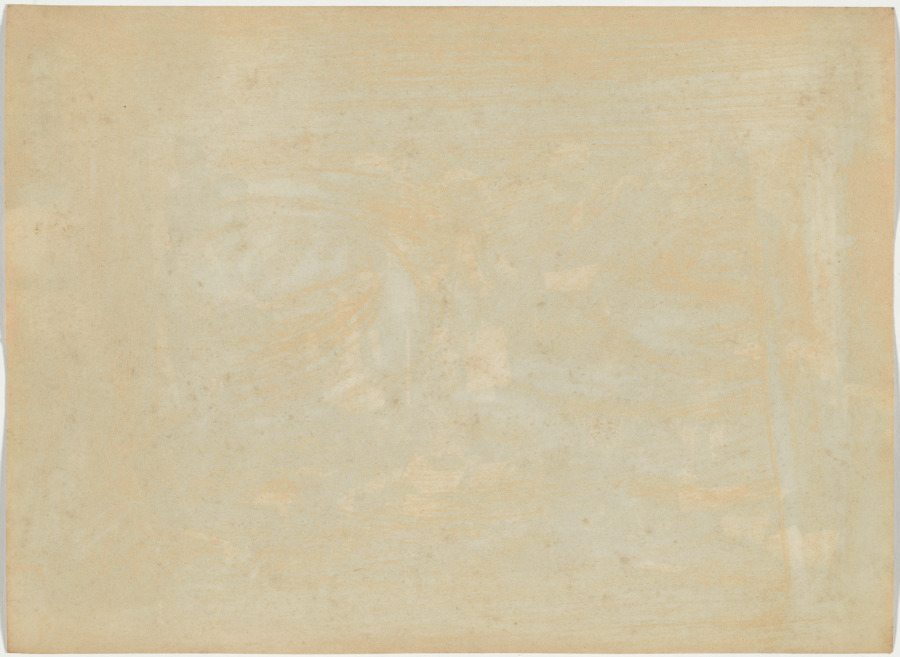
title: Maharaja of Rewa and Classmates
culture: India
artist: Raja Deen Dayal (Indian, 1844–1905)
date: 1886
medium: albumen print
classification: Photograph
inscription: No visible inscriptions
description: Deen Dayal uses the arrangement of people and the architecture to point to the most important person in the photograph. Here, the Maharaja of Rewa is placed front and center. “Sardars,” inscribed on the top picture’s mount, refers to the military officials surrounding him. After 1858, British influence dictated that Indian rulers be educated in European history and ideas as well as their local culture and history. In the bottom image, the young maharaja is shown with Indian teachers, but the instructional tools are Western: bound books and a raised relief globe (with Asia visible).